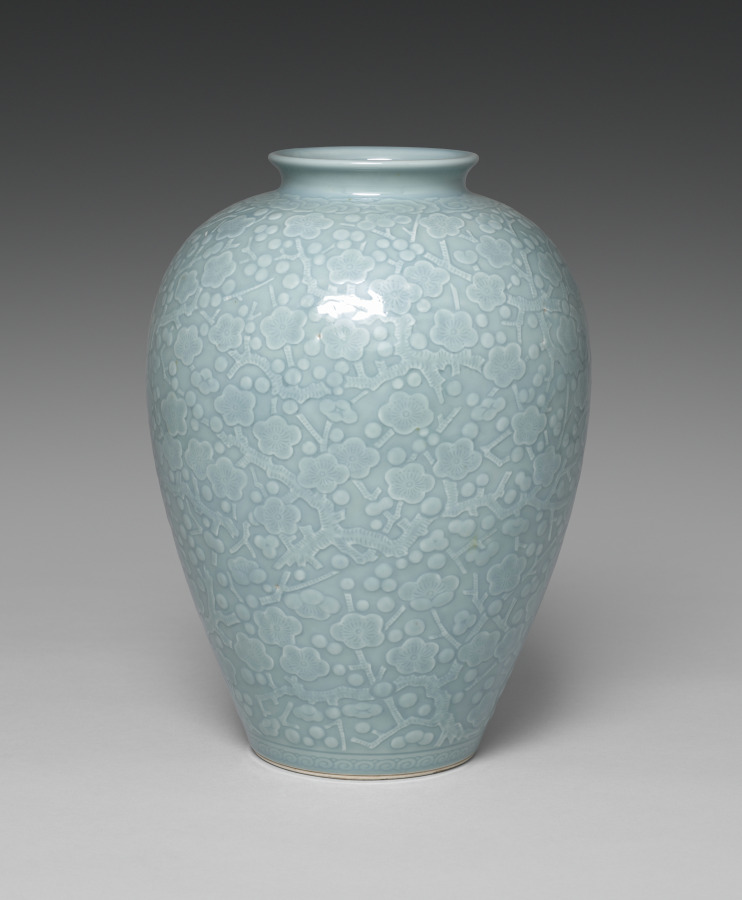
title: Vase with Plum Blossoms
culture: Japan, Taishō period (1912–26) or Shōwa period (1926–89)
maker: Seifū Yohei IV (Japanese, 1872–1951)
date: 1914–46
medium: Glazed porcelain with molded and carved design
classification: Ceramic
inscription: 清風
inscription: "James & Christine Heusinger/ Japanese Art Collection"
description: Although inspired by representations of flowering plum, or prunus, in Chinese ceramics, the dense allover design of branches on this vase also resembles Japanese textile patterns. As they might on a kimono, the trunks run in alternate directions up and down the surface. At the foot, or bottom of the vase, is a classic band of spirals, and at the neck, or narrowed portion near the opening, is a collar of clouds.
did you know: Yohei IV’s allover design of budding and flowering plum blossoms, strongly associated with spring and with China, is combined with his father’s “water color” glaze on this vase.